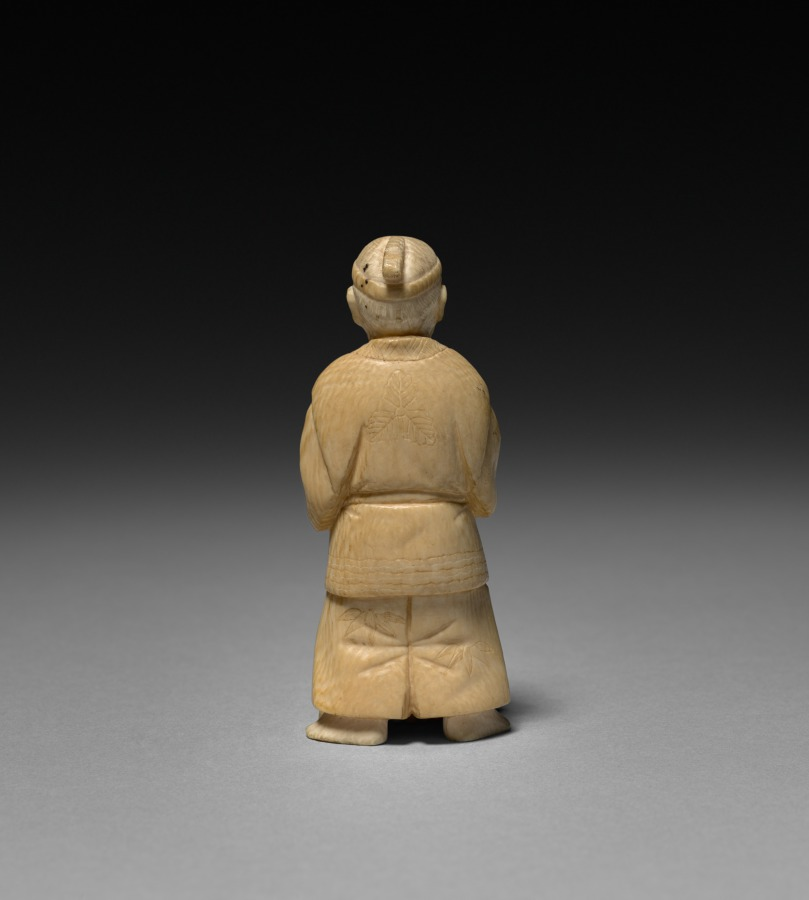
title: Japanese Man with Rake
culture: Japan, Meiji period (1868–1912)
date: early 1900s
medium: ivory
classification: Ivory